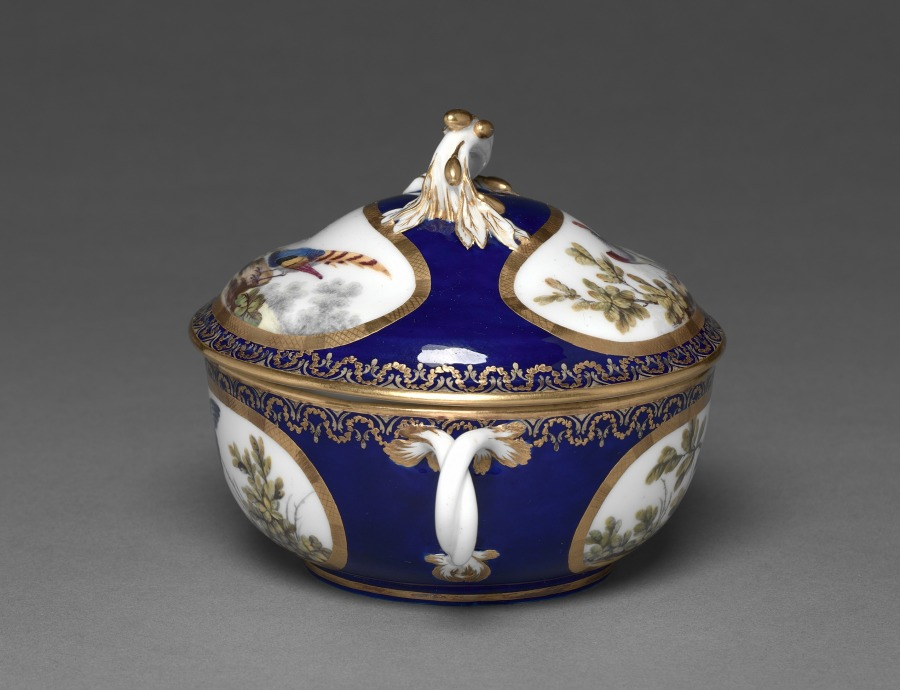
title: Covered Broth Bowl and Stand (Écuelle ronde et plateau ovale)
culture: France, Sèvres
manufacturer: Sèvres Porcelain Factory (French, est. 1756)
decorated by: François-Joseph Aloncle (French)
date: 1772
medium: soft-paste porcelain with enamel and gilt decoration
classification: Ceramic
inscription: Interlaced Ls with date letter 'T'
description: Birds were collected in all forms during the 18th century following an increased European interest in natural history. The birds on this bowl and stand were painted by François-Joseph Aloncle, one of the Sèvres porcelain factory’s principal bird painters. Small, two handled bowls like this one would hold broths or soups consumed by an individual during the toilette, a ritual of washing and dressing practiced by the 18th-century French elite.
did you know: Two different colors of gold decorate these objects’ borders, exemplifying more complex forms of gilding introduced in the 1770s.